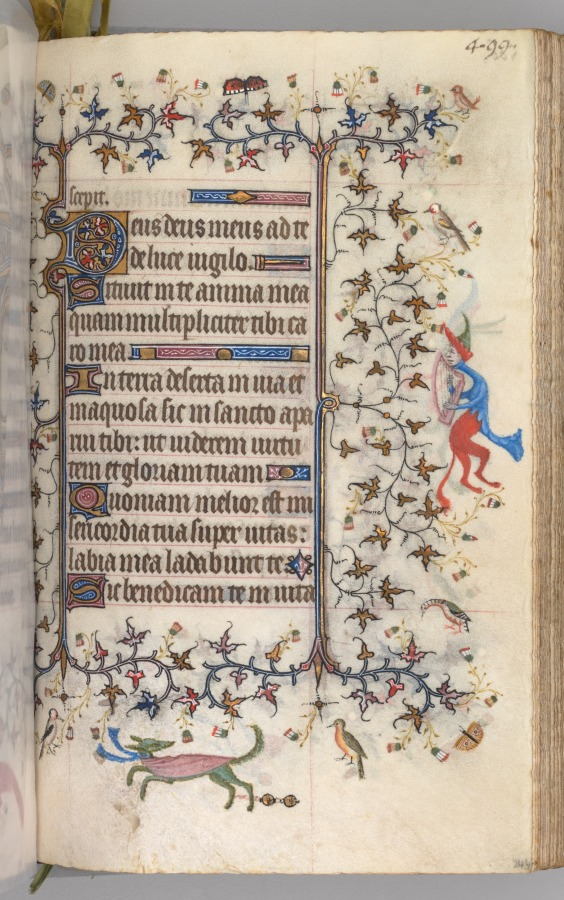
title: Hours of Charles the Noble, King of Navarre (1361-1425): fol. 244r, Text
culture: France, Paris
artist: Master of the Brussels Initials and Associates (French)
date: c. 1405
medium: ink, tempera, and gold on vellum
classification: Bound Volume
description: This precious volume was obviously highly prized by its owner, the French-born King of Navarre, who had his coat of arms painted on no less than twenty folios. Rather than directly commissioning this manuscript from a specific workshop, it seems that Charles the Noble acquired his book of hours -- perhaps ready-made for the luxury market -- while on a trip to Paris in 1404-05. A collaborative effort, six painting styles are evidenced within the pages of this codex, those of two Italians, two Frenchmen, and two Netherlanders. The painter who was responsible for the planning and decoration of the book, and who produced seventeen of the large miniatures, was a Bolognese artist known as the Master of the Brussels Initials. His principal assistant, responsible for most of the borders, was a Florentine who signed his name "Zecho" da Firenze on folio 208 verso.